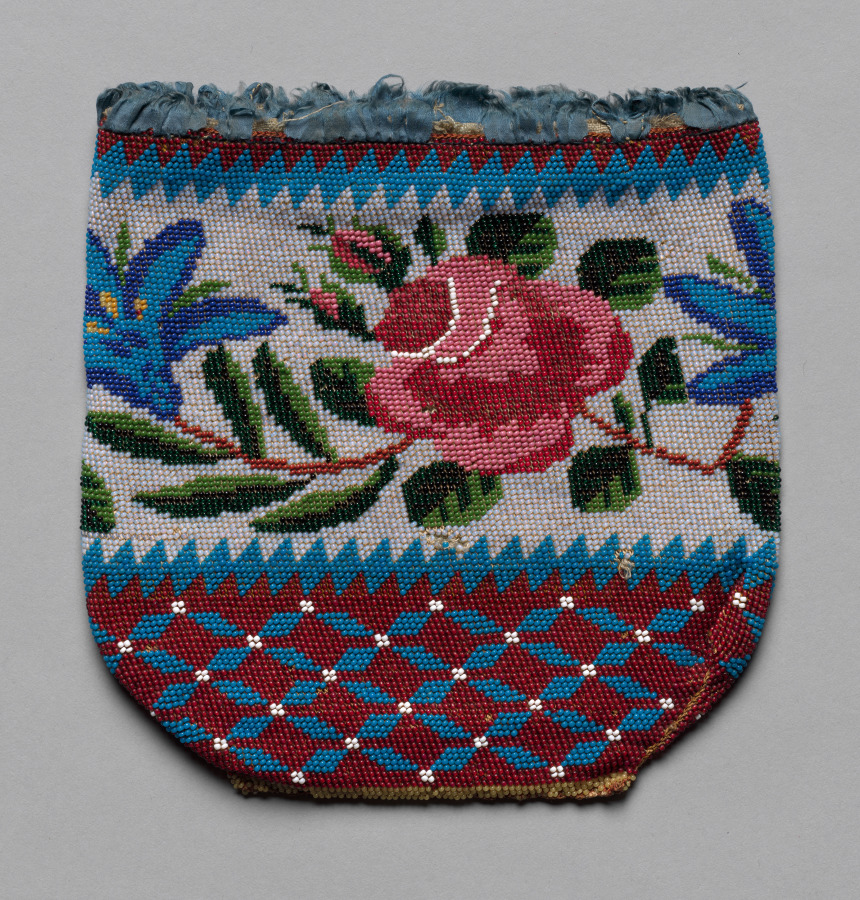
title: Beaded Bag (floral motif)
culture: America, early 19th century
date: early 19th century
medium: glass beads, cotton? lining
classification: Garment